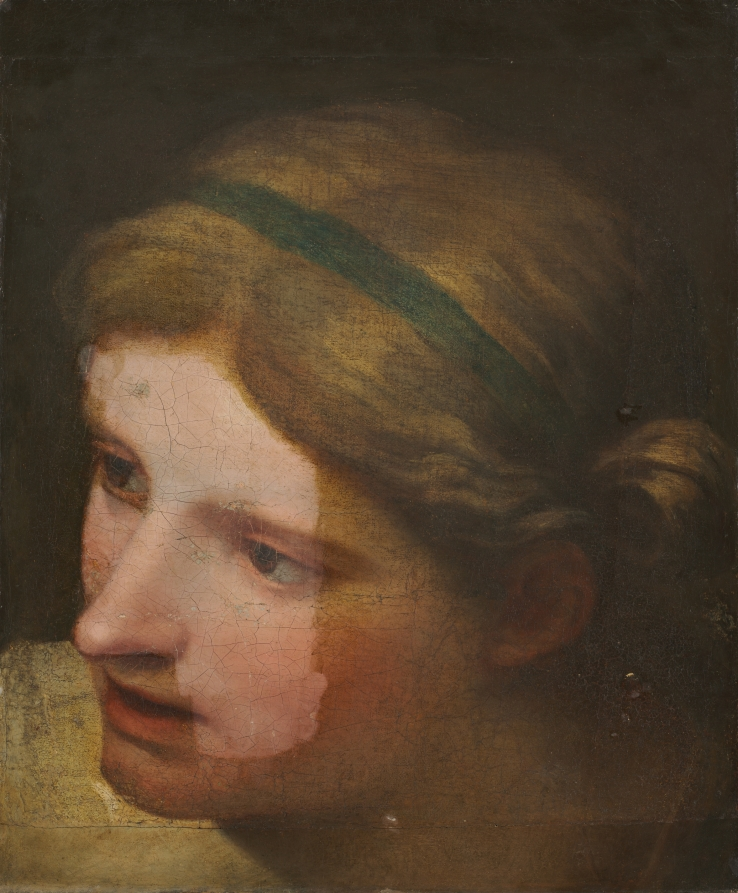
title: Listening Angel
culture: Northern Italy, 16th century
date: 16th century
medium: oil on canvas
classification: Painting